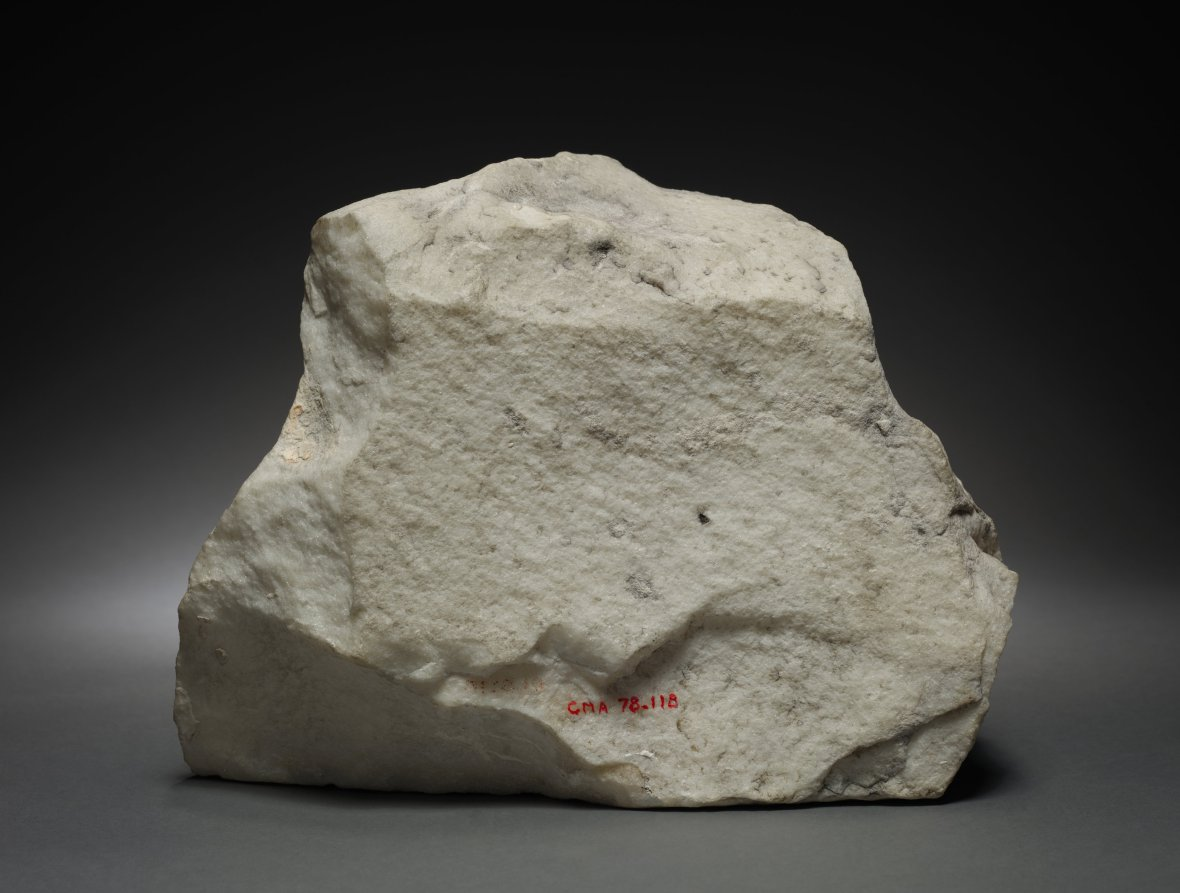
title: Head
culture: France, 19th century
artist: Édouard Charles Marie Houssin (French, 1847–1919)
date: 1893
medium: marble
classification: Sculpture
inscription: Signed lower right: "E. Hovssin"